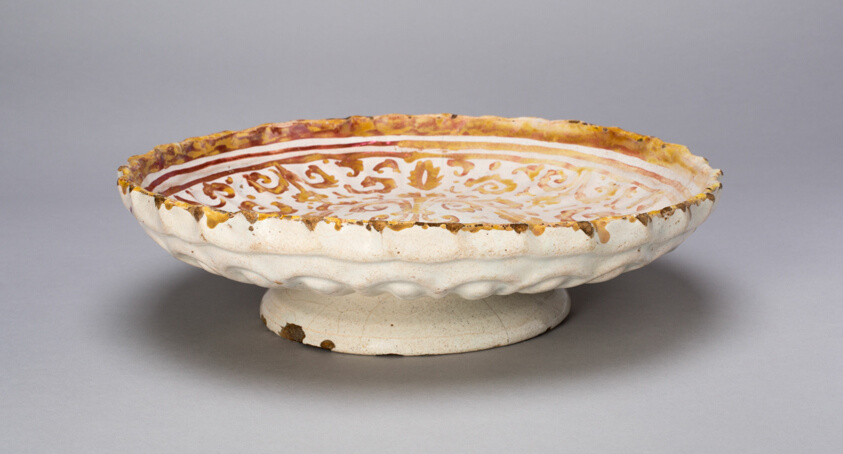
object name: Ceramics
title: Plate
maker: Italy, Umbria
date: c.1500/50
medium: Majolica, ceramic, with "golden" lustre glaze, overall design in "golden" lustre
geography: Gubbio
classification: earthenware; ceramics; european decorative arts; decorative arts